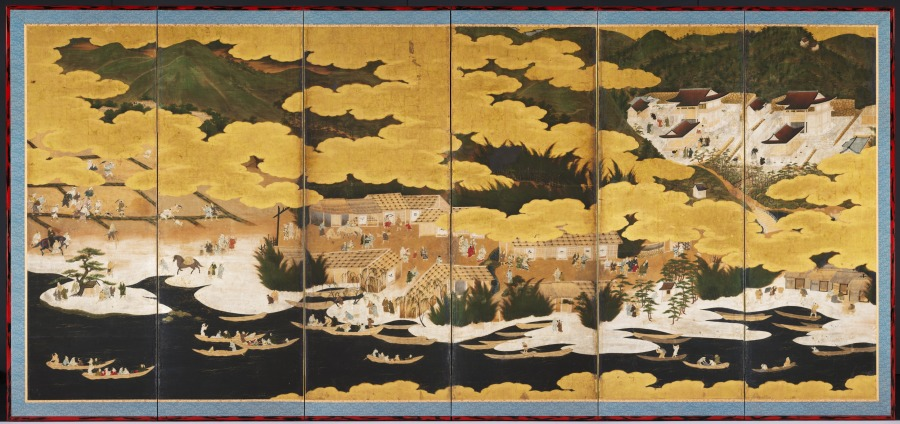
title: Famous Views of Ōmi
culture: Japan, Edo period (1615–1868)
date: 1660s–90s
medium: pair of six-panel folding screens; ink, color, and gold on gilded paper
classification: Painting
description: Ōmi is an area around Lake Biwa near Kyoto. The Shinto shrine Hiyoshi Taisha and the Buddhist temple Ishiyamadera are in the upper right and upper left of the composition, respectively. At center is the pilgrimage route, and people in the town before the temple gates. Harvested rice fields at right and cherry blossom trees in flower at left show seasonal change from winter to spring.